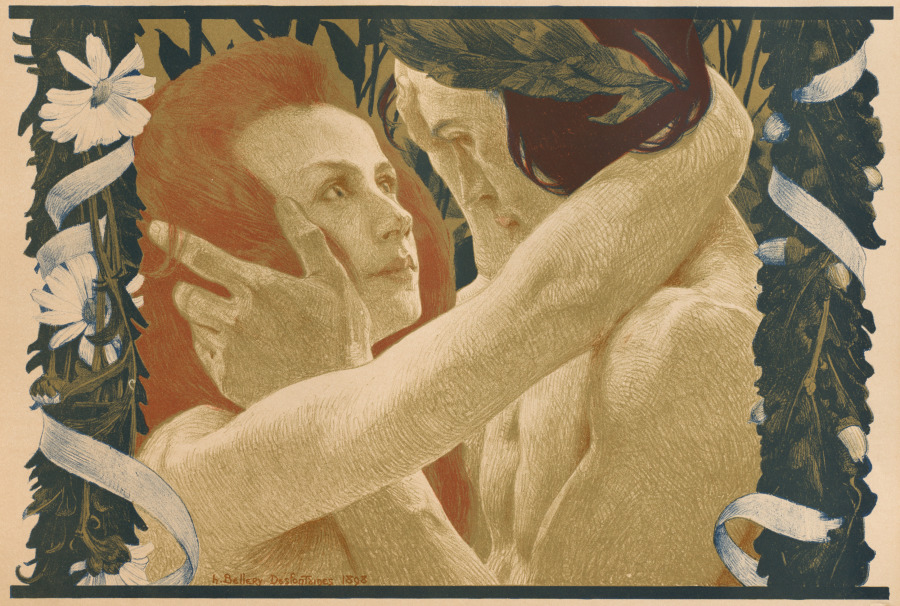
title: L'Énigme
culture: France, Paris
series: L'Estampe Moderne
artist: Henri Bellery-Desfontaines (French, 1867–1910)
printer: Imprimerie Champenois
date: 1898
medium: Color lithograph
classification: Bound Volume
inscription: In plate: lower margin: h. Bellery DesfonTaines 1898; upper right corner of sheet: blindstamp of l'Estampe Moderne (Lugt 2790)